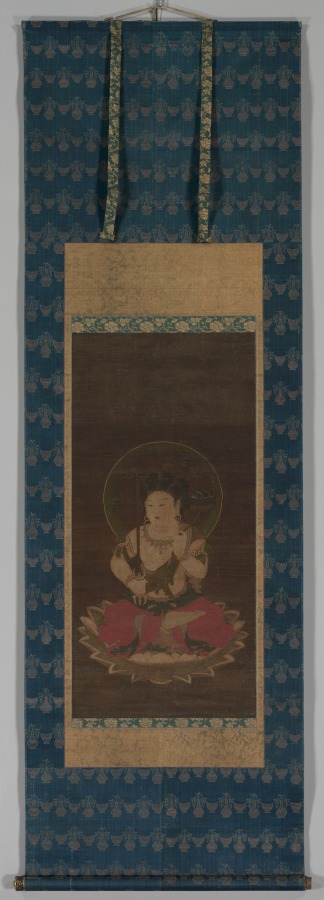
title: Monju as a Child (Chigo Monju)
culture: Japan, Muromachi period (1392–1573)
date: early 1400s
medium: hanging scroll; ink, color, and gold on silk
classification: Painting